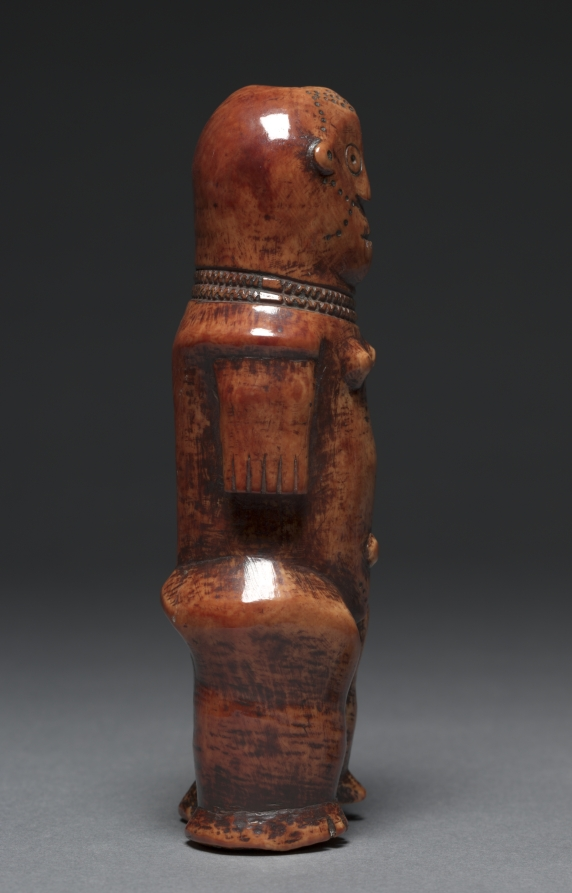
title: Figure (iginga)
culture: Africa, Central Africa, Democratic Republic of Congo, Lega-style maker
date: probably 1800s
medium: Elephant ivory, tukula, and oil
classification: Sculpture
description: The life of Lega men and women is structured around their advancement through the different grades of the Bwami association. Fulfilling political, social, religious, and other roles, the members’ ultimate purpose is the pursuit of wisdom and excellence. Ivory figurines were reserved for members of the two highest Bwami grades, in which the core of the Lega’s moral philosophy is revealed.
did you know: The dark surface (patina) of this sculpture comes from years of handling and the application of oil and a red powder called tukula; it was originally cream-colored!